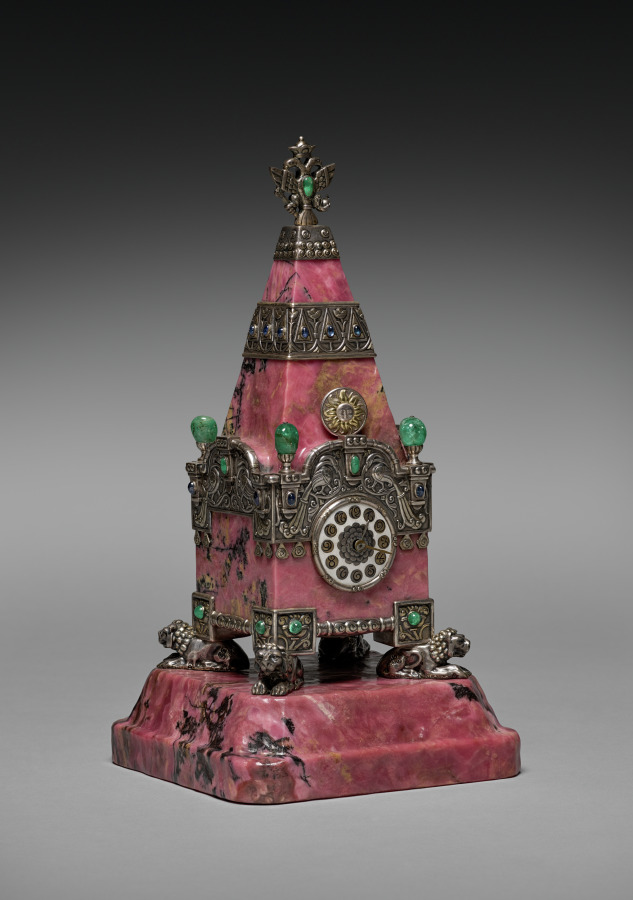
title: Kremlin Tower Clock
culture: Russia, St. Petersburg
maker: House of Fabergé (Russian, 1842–1918)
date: c. 1913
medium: rhodonite, silver, enamel, emeralds, sapphires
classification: Timepiece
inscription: 84, Kokoshnik, delta [assay mark for Moscow, 1908-26]; 91, Kokoshnik; 91; Kokoshnik; C. Fabergé (in Cyrillic); double-headed eagle [imperial warrant]; 16419 k? scratched.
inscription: Painted on clock face: Le Gruet (in script); strike, silence, set hand work (in English).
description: The use of Russian hardstones in creating precious objects became a hallmark of design from the House of Fabergé. Easily carved, these minerals were sourced largely from the western region surrounding the Ural Mountains. Fabergé's workmasters used colorful stones such as agate, nephrite (jade), lapis lazuli, rock crystal, and rhodonite, seen here in this elaborate table or mantel clock, to create all manner of luxurious accessories. Bright pink rhodonite was among the rarest, and consequently most expensive, specimens used by the House of Fabergé. This clock resembles the Taynitskaya Tower, the middle tower on the south side of the Kremlin. The House of Fabergé created this work to commemorate the 300th anniversary of the Romanov dynasty, representing Fabergé's ability to balance the functionality of objects with intricate decorative design.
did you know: The Kremlin tower, which this clock resembles, has a secret well and an underground tunnel that leads to the Moscow River.